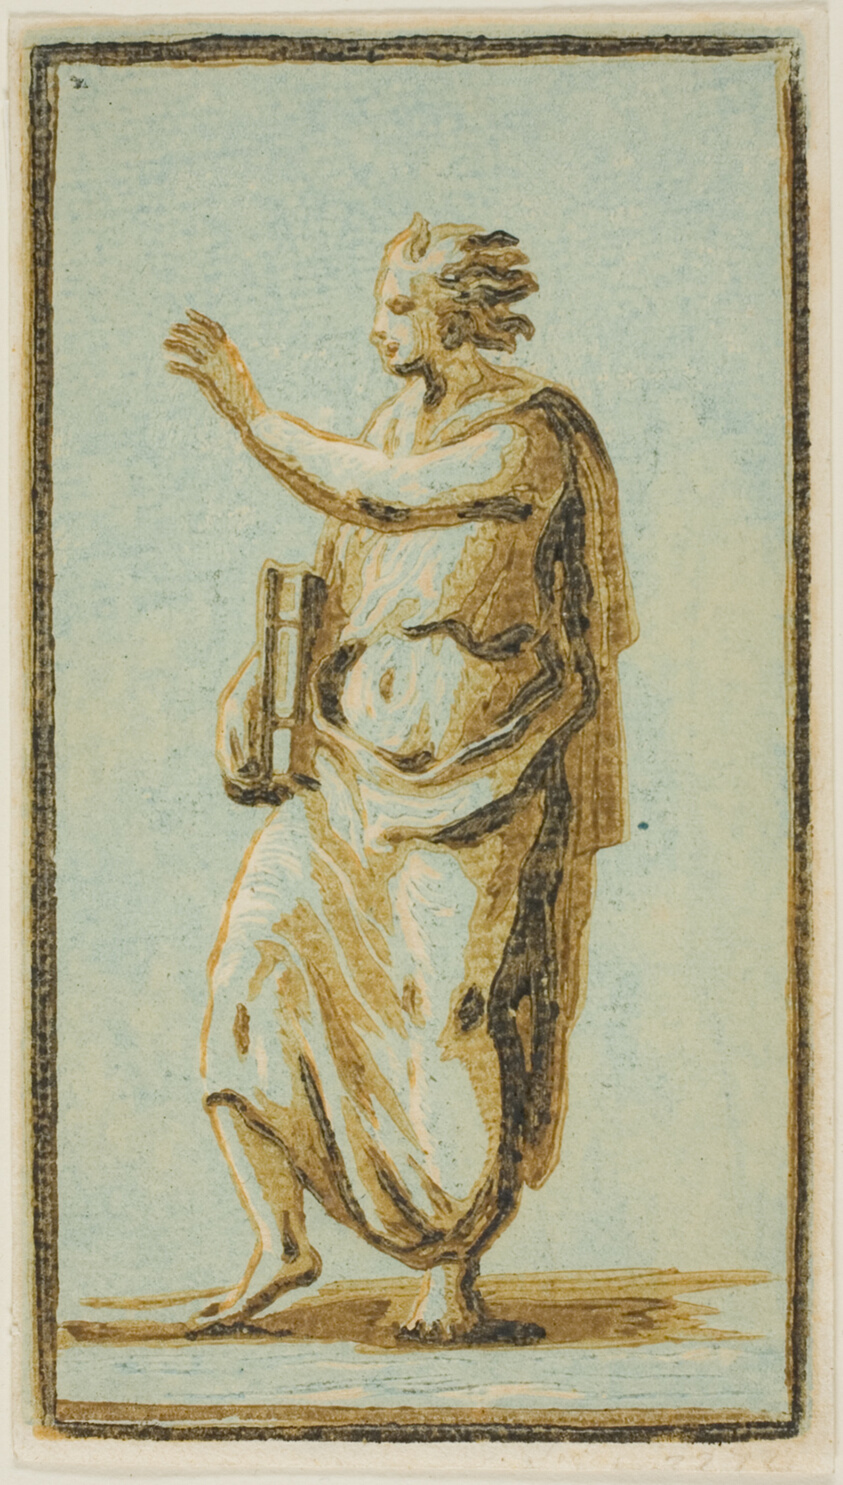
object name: Print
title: Young Man Standing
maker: Jean Michel Papillon; French, 1698-1776; after Conte Anton Maria Zanetti; Italian, 1680–1767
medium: Chiaroscuro woodcut in light blue, light brown, dark brown, and black on ivory laid paper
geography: France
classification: woodcut; print; prints and drawing